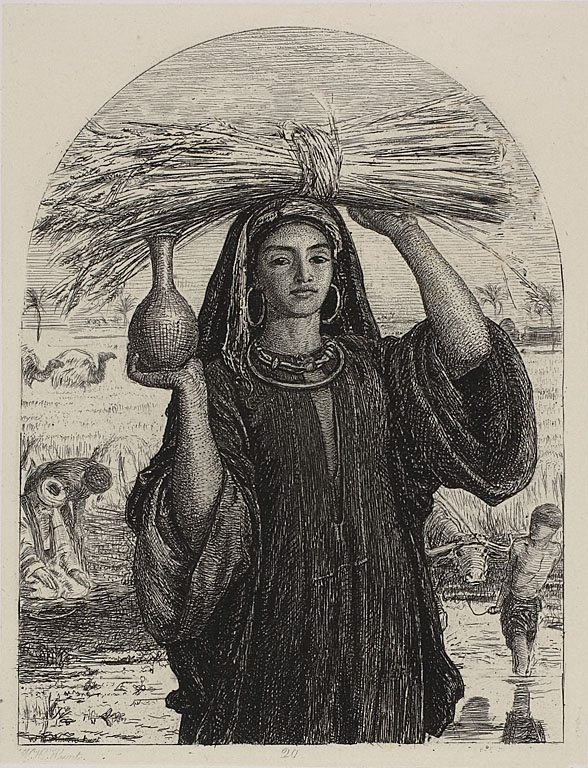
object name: Print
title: The Abundance of Egypt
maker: William Holman Hunt (English, 1827-1910)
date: 1857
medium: Etching on cream wove chine laid down on off-white wove paper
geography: England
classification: etching; print; prints and drawing